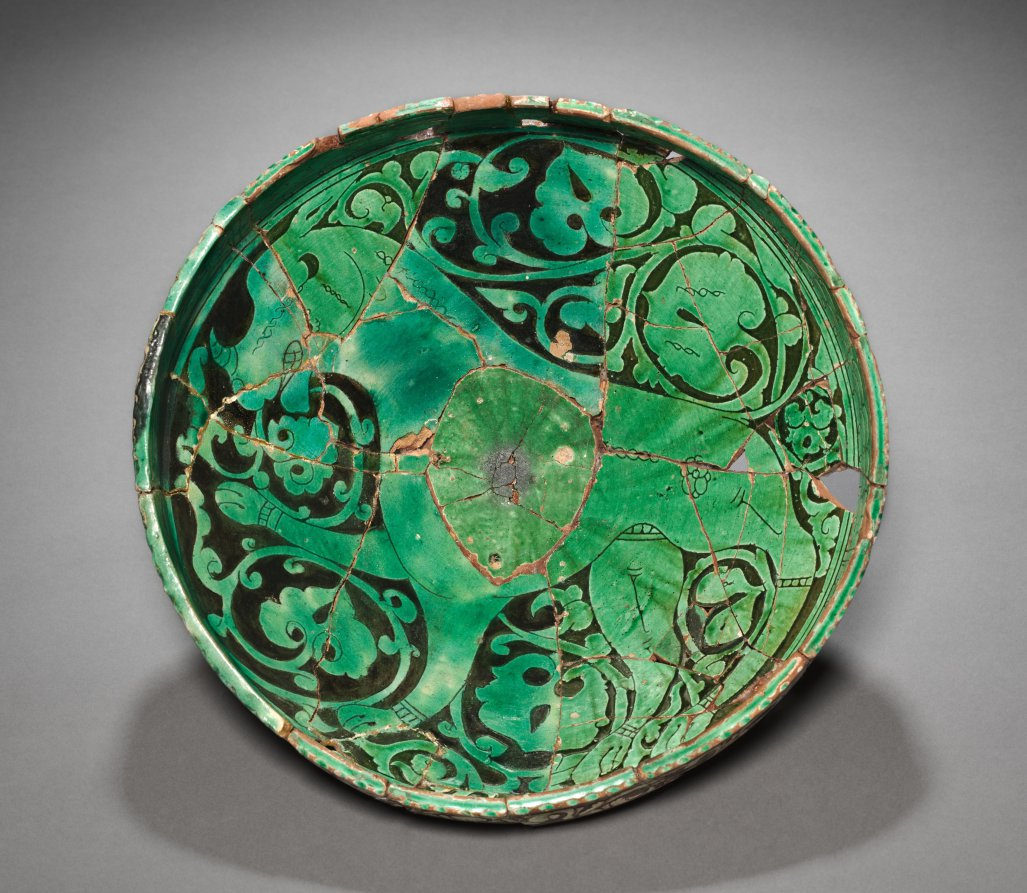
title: Bowl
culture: Northwest Iran, Garrus district, late Saljuq Period, 12th-13th Century with 20th Century replacement fragments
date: 1100s–1200s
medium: earthenware with underglaze slip-painted decoration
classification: Ceramic